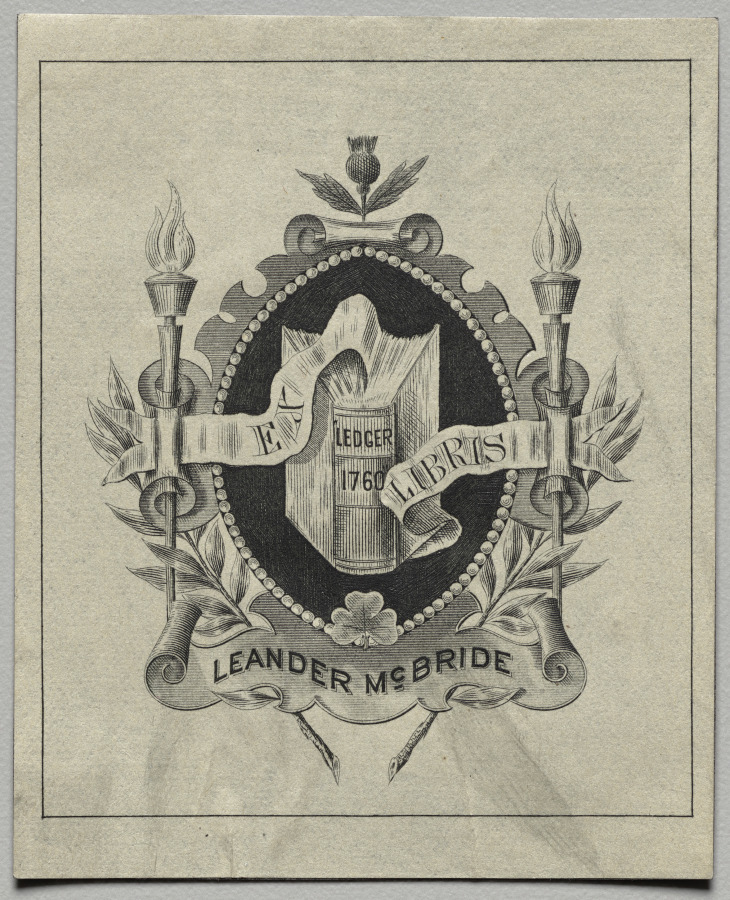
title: Bookplate: Leander McBride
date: 1760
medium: print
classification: Print